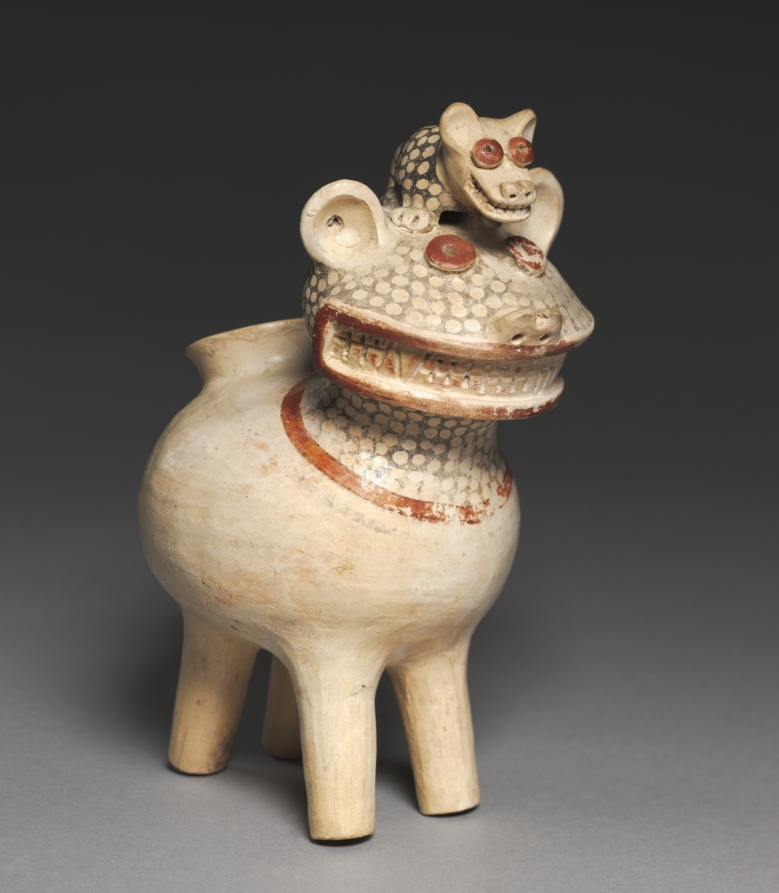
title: Feline Vessel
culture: Central Andes, North Highlands, Recuay people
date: 1–700 CE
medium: ceramic, red and white slips, black pigment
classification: Ceramic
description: Recuay art is under-studied and it is difficult to know the meaning of the wonderfully stylized feline on whose head perches a small passenger that may be a coatimundi, a nosy, busy, racoon-like animal. Elsewhere in Recuay art, felines are shown as virile predators, making it likely that in general they were symbols of leadership. The feline is painted with white and red slips; after firing, a resist application of black pigment was used to create the dotted pattern.